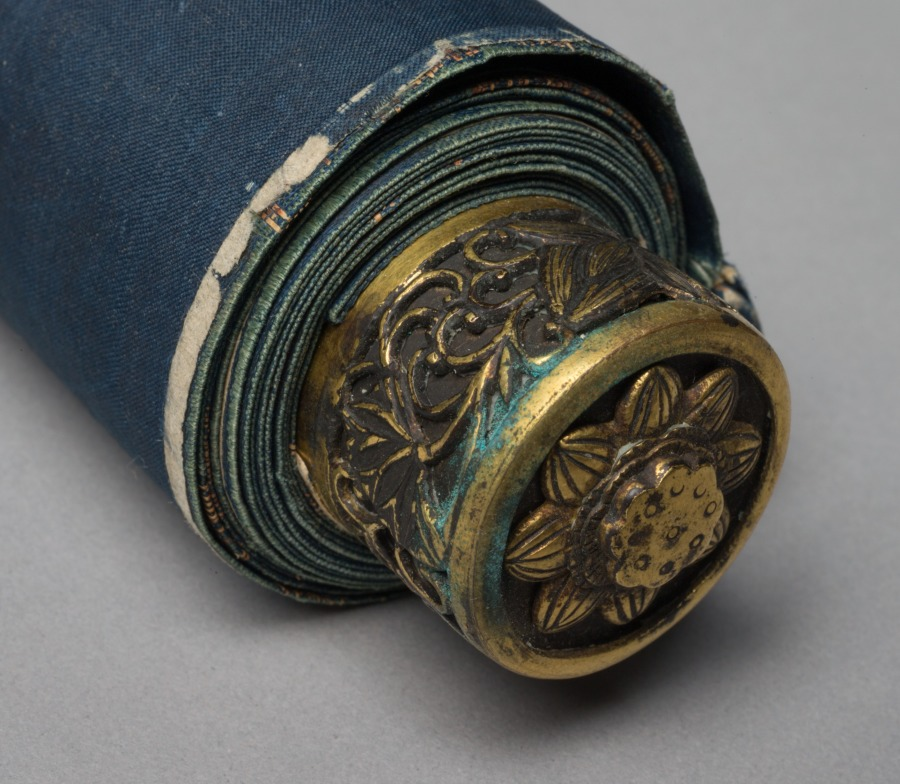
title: Monju as a Child (Chigo Monju)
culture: Japan, Muromachi period (1392–1573)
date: early 1400s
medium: hanging scroll; ink, color, and gold on silk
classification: Painting